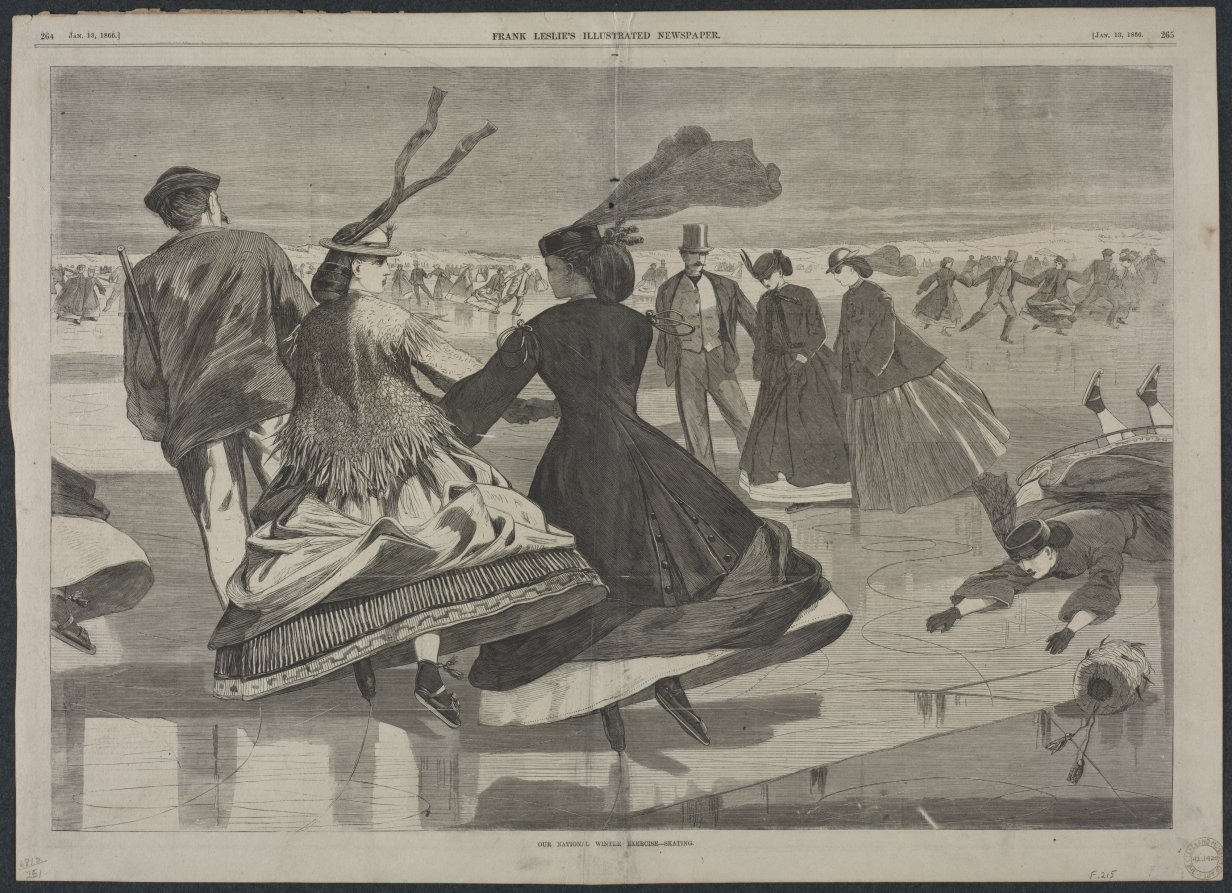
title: Our National Winter Exercise - Skating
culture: America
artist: Winslow Homer (American, 1836–1910)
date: 1866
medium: wood engraving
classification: Print